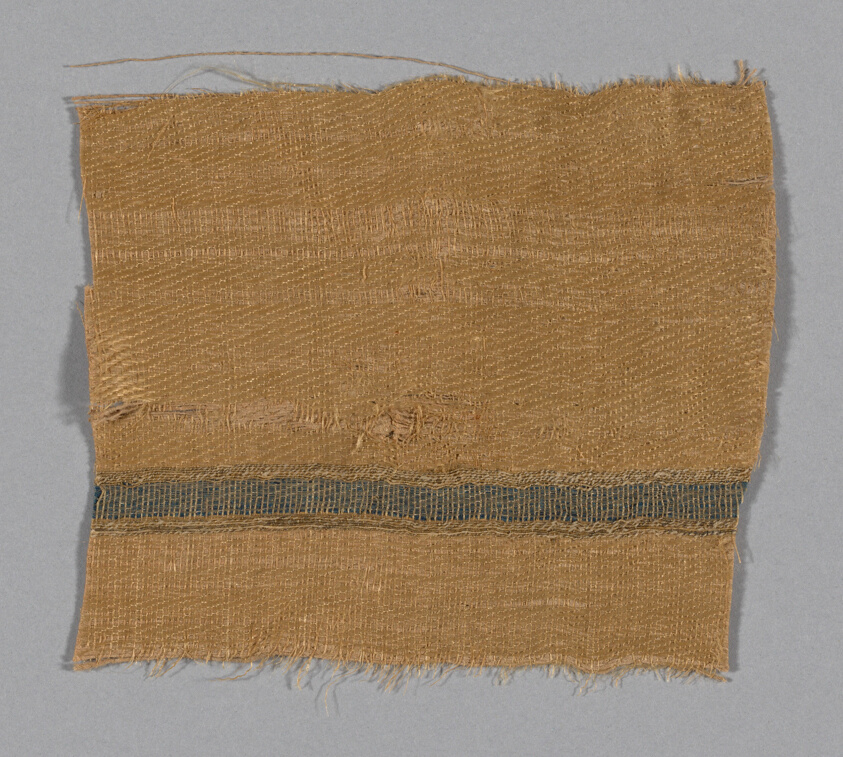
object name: Textile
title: Fragment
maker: Spain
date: 13th century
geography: Spain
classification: textile; weaving